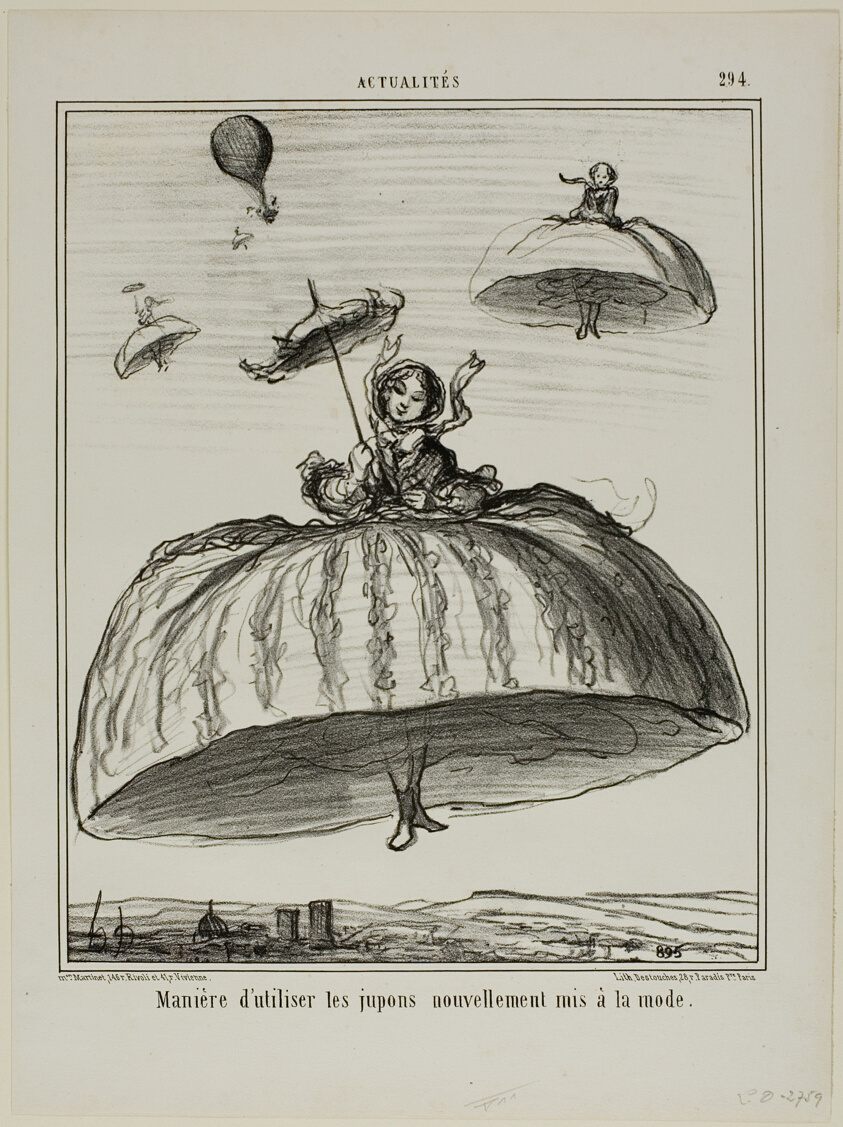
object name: Print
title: Another way to make use of the new petticoats that have lately become fashionable, plate 294 from Actualités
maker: Honoré Victorin Daumier; French, 1808-1879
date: 1856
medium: Lithograph in black on white wove paper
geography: France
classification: lithograph; print; prints and drawing